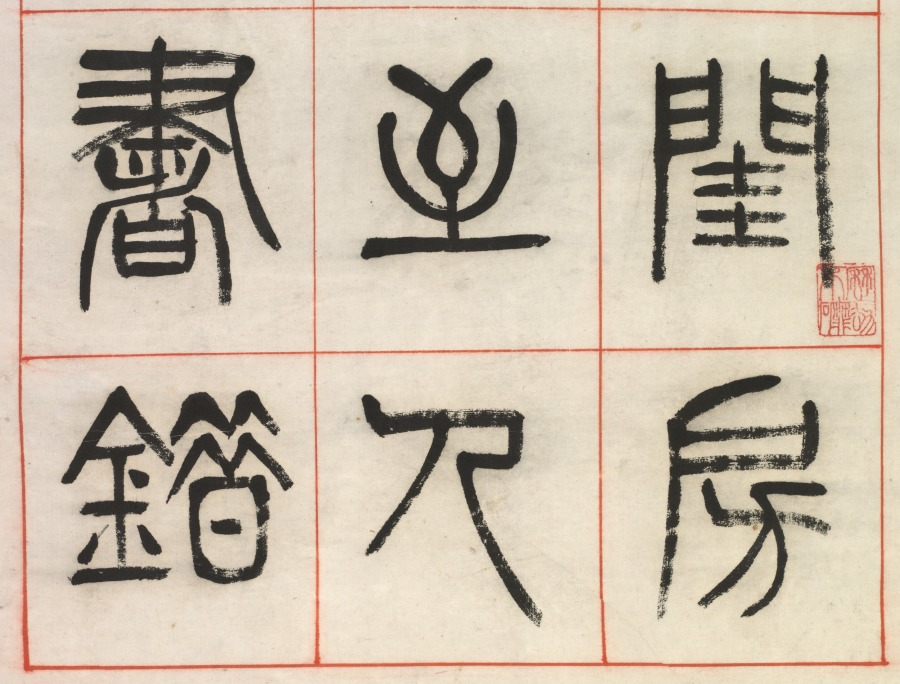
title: On Happiness, Calligraphy in Seal Script Style (zhuanshu)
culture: China, Changsu, Qing dynasty (1644-1911)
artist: Yang Yisun (Chinese, 1813–1881)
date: 1871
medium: hanging scroll, ink on paper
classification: Painting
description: Yang Yisun transcribed this ancient text on six narrow scrolls, starting at the top right and ending at the bottom left. Yang emphasizes the text’s historic nature by using the seal script style found on stone steles and bronze vessels. On Happiness features reflections of a scholar on a leisurely life in the countryside, composed by Han dynasty official Zhongchang Tong, who died the year the Han dynasty collapsed (AD 220). The idyllic life described in the text may bean evocation of the past in a time of national crisis. A decade before Yang wrote these scrolls, Anglo-French forces had looted and burned the Summer Palace in Beijing. At the same time, the domestic Taiping rebellion (1850–64), led by a religious fanatic to overthrow the Qing government, had devastated Yang’s homeland, the Jiangnan region, with an estimated 20 million lives lost.